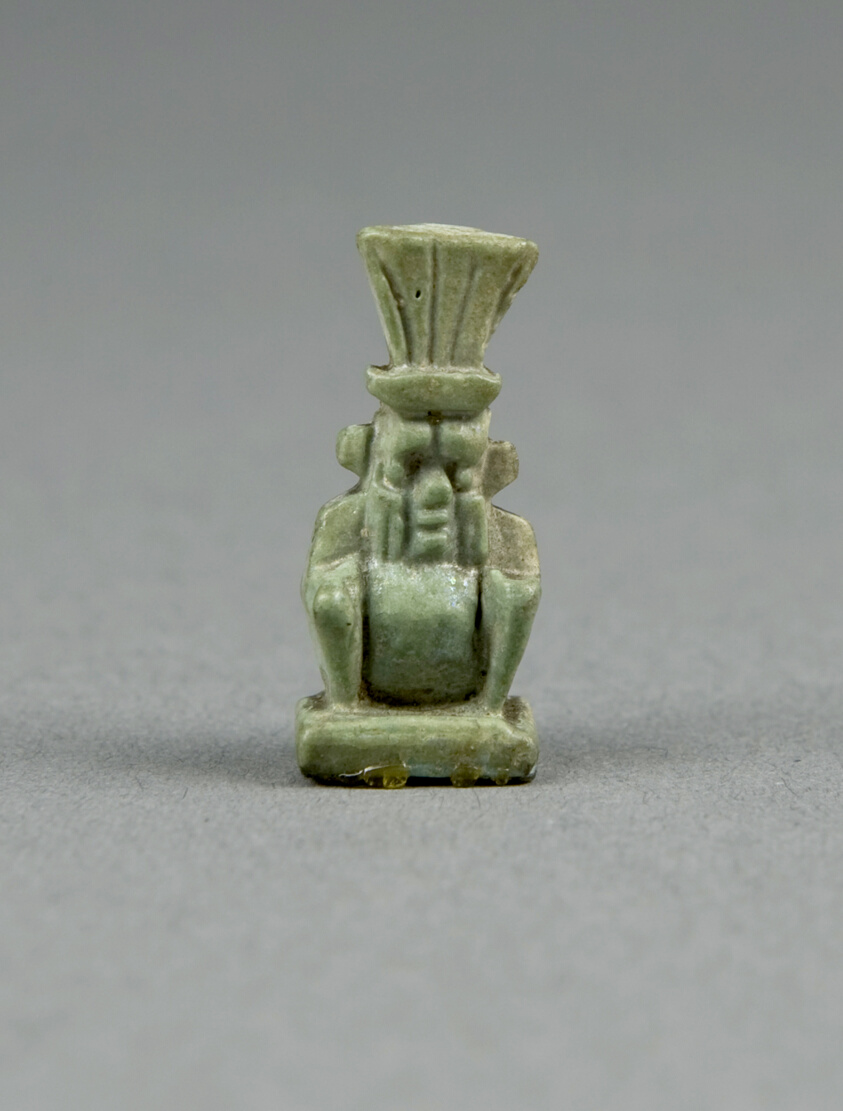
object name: Costume and Accessories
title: Amulet of the God Bes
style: third intermediate period, egyptian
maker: Egyptian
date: Third Intermediate Period, Dynasty 21–25 (1070–656 BCE)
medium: Faience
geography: Egypt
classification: amulet; jewelry; ceramics; ancient art; costume; faïence (composite material)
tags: gods (deities)